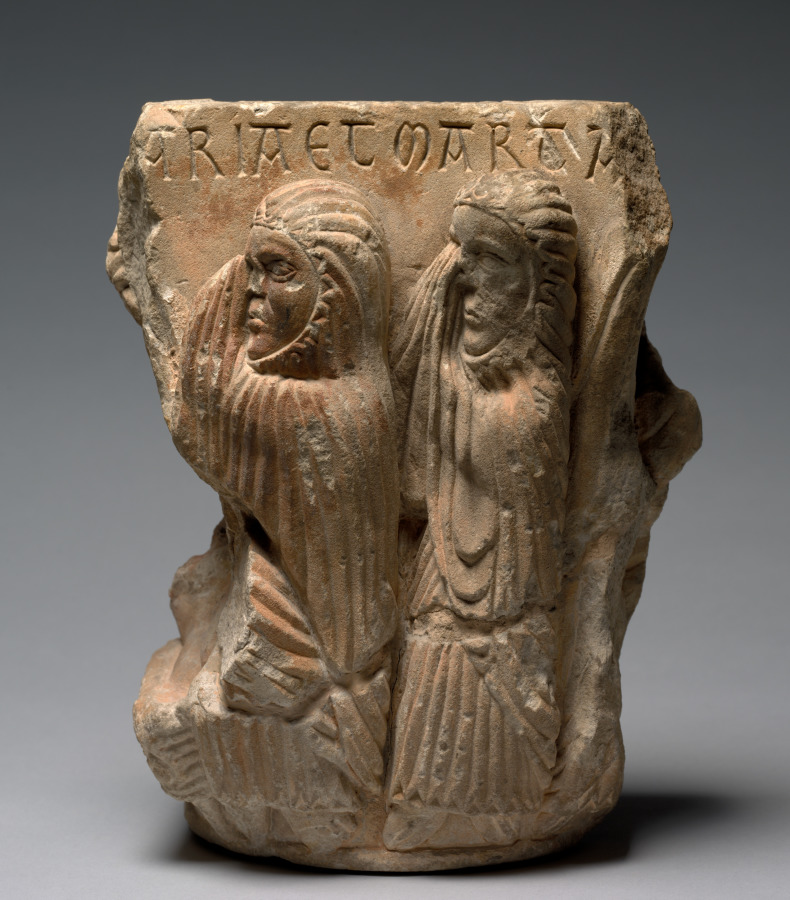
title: Fragment of a Double Capital: Mary and Martha at the Raising of Lazarus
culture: Southwest France, Ariège, region of Foix, mid-12th century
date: 1145–1165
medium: quartz sandstone with traces of polychromy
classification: Sculpture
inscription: inscription above the draped figures of Mary and Martha: "MARIA ET MARTA"; to the left of the two figures is a portion of a decorated sarcophagus depicted in the lower half with an inscription of Christ's words: "VENI FORAS" ([Lazarus] come forth).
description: The front face of this capital fragment presents the two mourning women identified by the inscription above: MARIA ET MARTA. On the left face appears the body of Lazarus in a sarcophagus bearing Christ's words: VENI FORAS ("[Lazarus], come forth" [John 11:43]). The Raising of Lazarus is one of the most popular themes in Christian art. This miracle represents Christ's power over death and thus prefigures the Resurrection. It also speaks of the hope of resurrection for all individuals, a common theme in early Christian catacombs and sarcophagi. The subject is less prevalent in sculpture of the Romanesque period, though quite popular in other media.